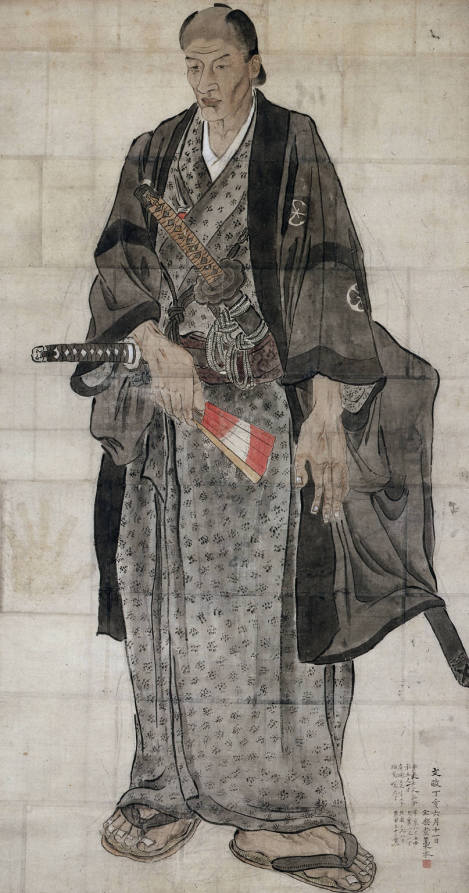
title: Portrait of Ōzora Buzaemon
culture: Japan, Edo period (1615–1868)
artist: Watanabe Kazan (Japanese, 1793–1841)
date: 1827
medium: hanging scroll; ink and color on paper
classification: Painting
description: Over seven feet tall, Ōzora Buzaemon became a tabloid sensation when he arrived in Edo (Tokyo) in 1827 . His handprints were cherished souvenirs, and his image was sold on woodblock prints. As inscriptions on the scroll detail, Watanabe Kazan met Buzaemon at the residence of a noted Confucian scholar. Using a camera obscura–type device—a tool that uses light to project an image onto a surface—he made this preliminary drawing for a painting. The portrayal depicts Buzaemon’s discomfort in being stared at.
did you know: Watanabe Kazan was interested in Rangaku (Dutch Learning).